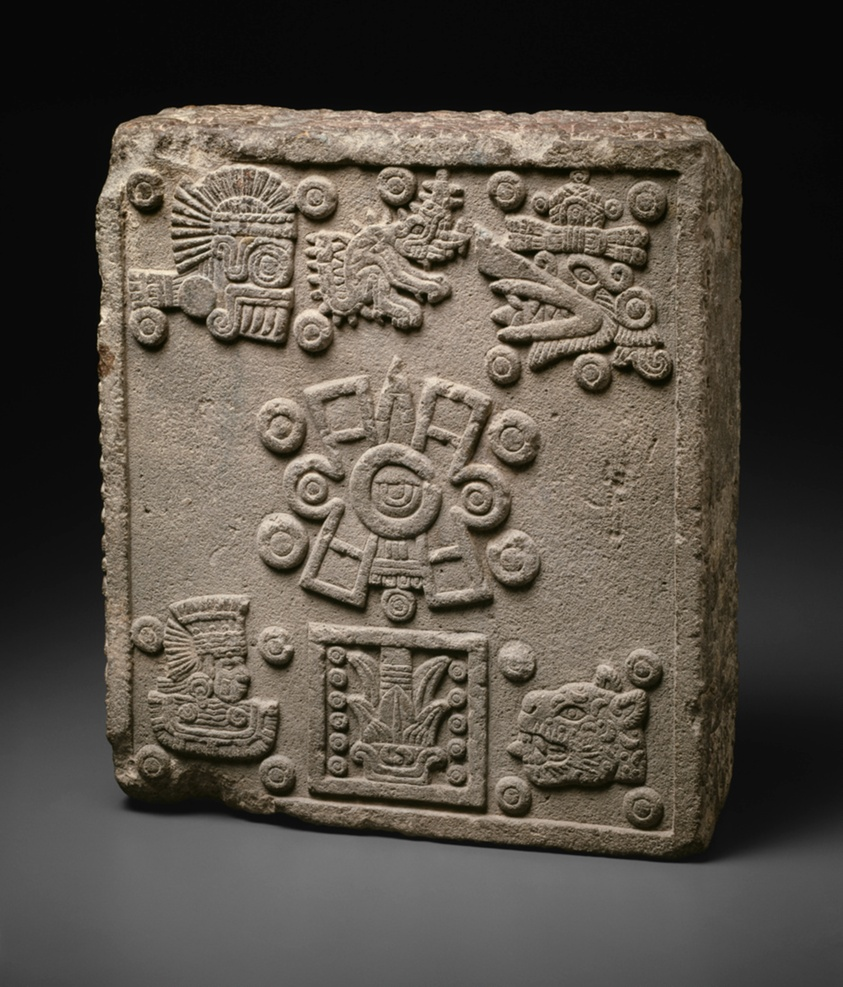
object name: Sculpture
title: Coronation Stone of Motecuhzoma II (Stone of the Five Suns)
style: aztec, mesoamerican, Pre-Columbian, americas, Arts of the Americas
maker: Aztec (Mexica) (Tenochtitlan, Mexico)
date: 1503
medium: Basalt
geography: Tenochtitlan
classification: ceremonial object; stone; art of the americas; sculpture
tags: architecture, history, coronations, animals, record of events, Hieroglyphs, Mexico, Aztecs, mythology, kingship, rulers (people), goddesses